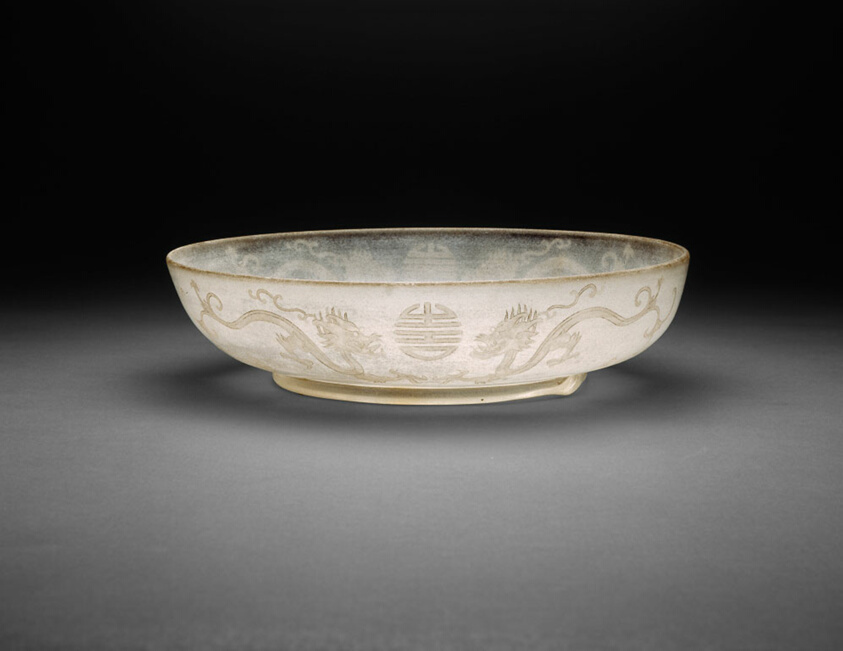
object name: Vessel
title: Dish with Dragons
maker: China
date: Qing dynasty (1644–1911), Yongzheng reign mark and period (1722–1735)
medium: Glass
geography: China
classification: dish (vessel); glass; asian art; vessel